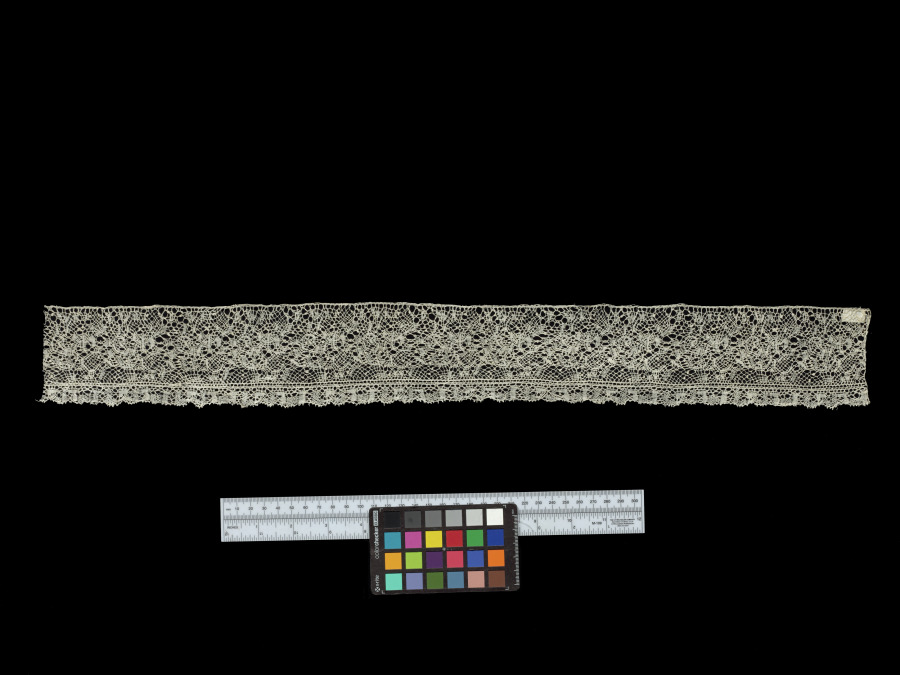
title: Lace Edging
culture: Belgium, Binche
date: 1800s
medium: Linen: bobbin lace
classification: Lace